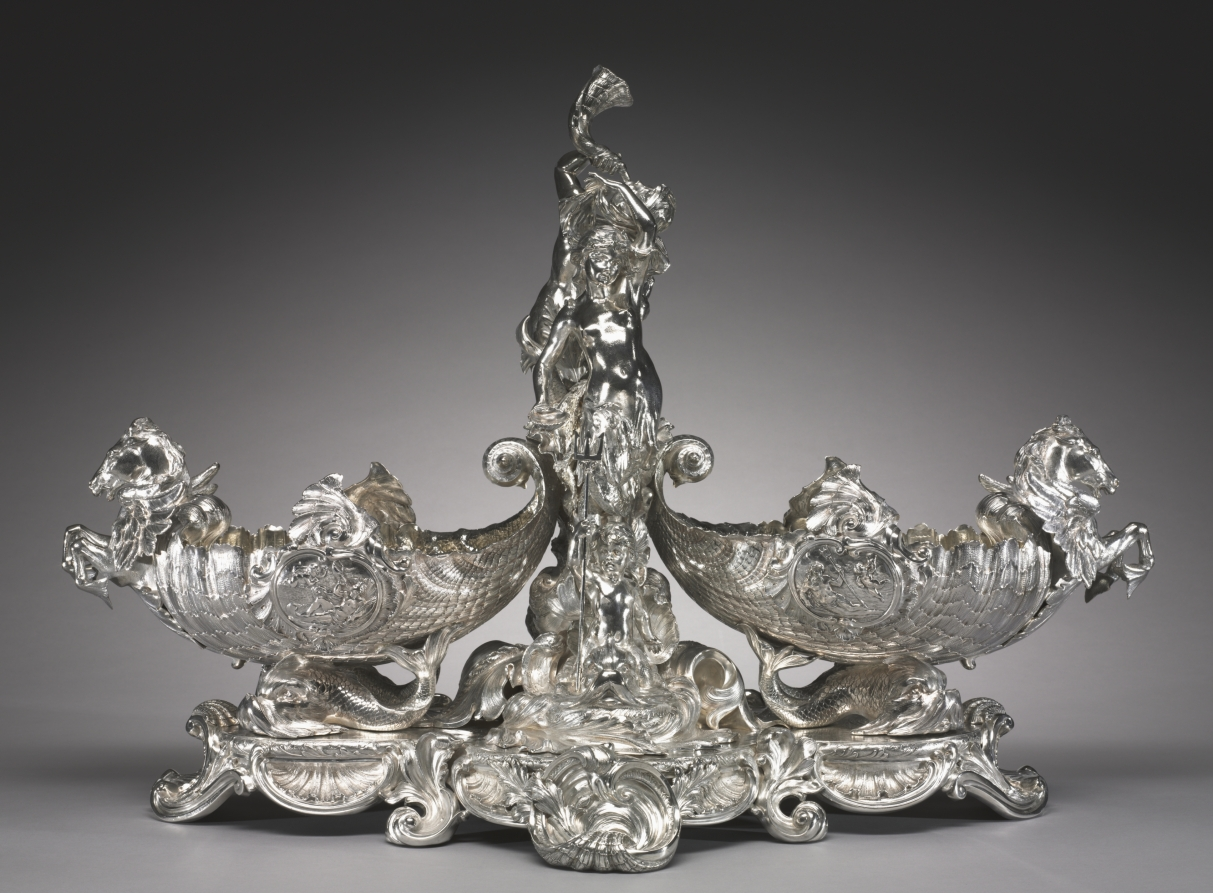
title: Centerpiece from the Nereid Service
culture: England, late 19th-early 20th century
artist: Goldsmith's & Silversmith's Company (British)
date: c. 1900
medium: silver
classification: Silver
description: Originally thought to have been made by the early 19th-century London silversmith Paul Storr because it had been marked with spurious Storr hallmarks, more recent scholarship has revealed that this service, representing the triumph of Great Britain on the high seas through the allegorical images of Grecian nymphs (nereids), was actually made to display at the 1900 world's fair in Paris. Such nationalistic fervor permeated design at the turn of the 20th century, especially in the years leading up to the First World War, when national pride was brought to its heels in Europe through a devastating conflict.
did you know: This centerpiece is actually the product of many hands since the Goldsmiths' and Silversmiths' Company operated as a cooperative of silversmiths who sold their work through the company.